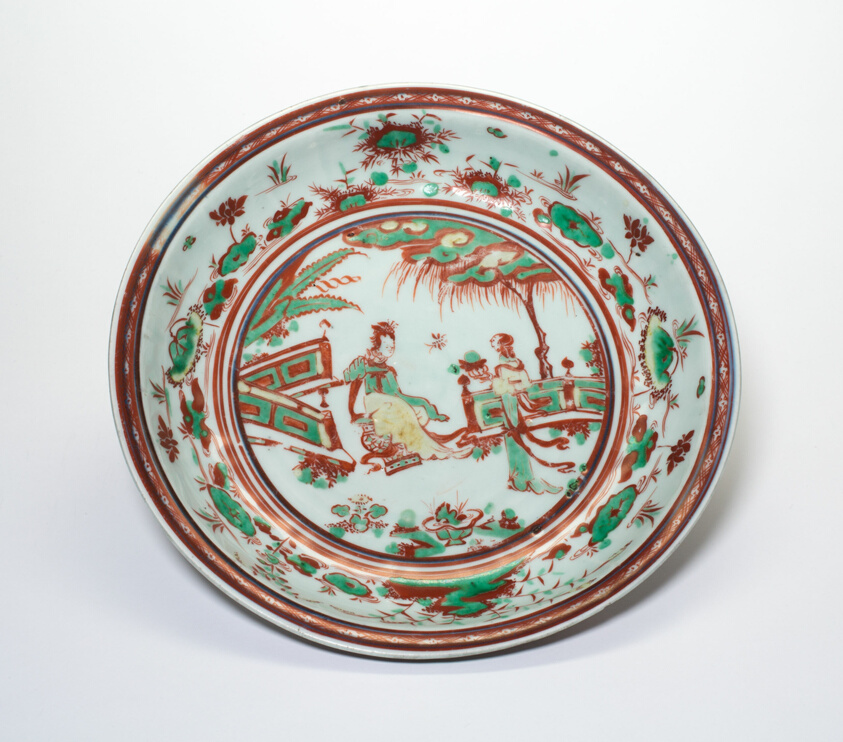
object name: Vessel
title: Dish with Two Women in a Garden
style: Chinese (culture or style)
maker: China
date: Ming dynasty (1368–1644)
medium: Porcelain painted in overglaze enamels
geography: China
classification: dish (vessel); porcelain; asian art; ceramics; vessel